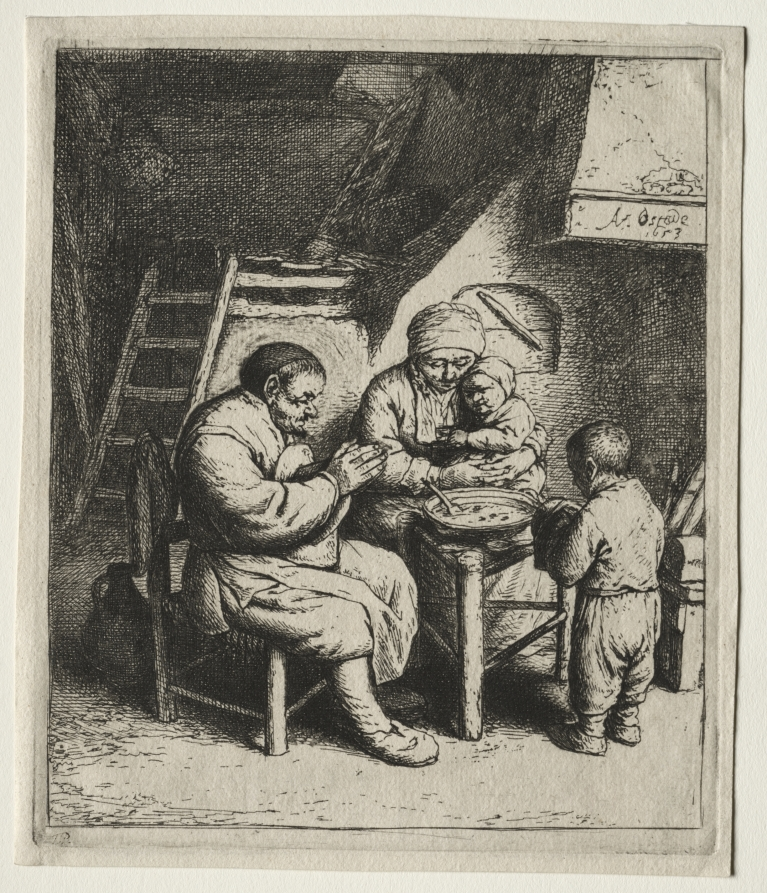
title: Saying Grace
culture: Netherlands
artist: Adriaen van Ostade (Dutch, 1610–1684)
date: 1653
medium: etching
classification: Print